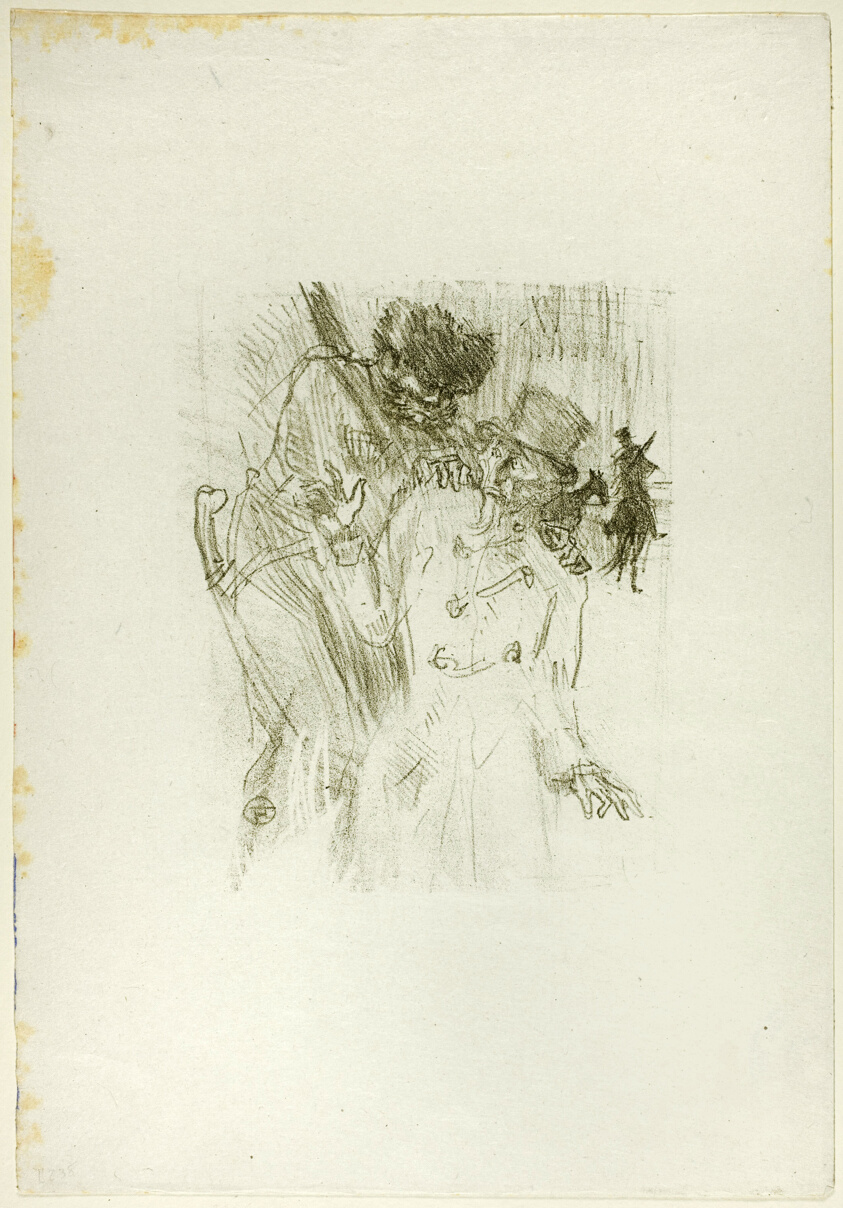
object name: Print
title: The Arrest of Schlomé Fuss, from Au Pied du Sinaï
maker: Henri de Toulouse-Lautrec (French, 1864-1901)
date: 1897, published 1898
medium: Color lithograph on ivory wove paper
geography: France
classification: lithograph; print; prints and drawing